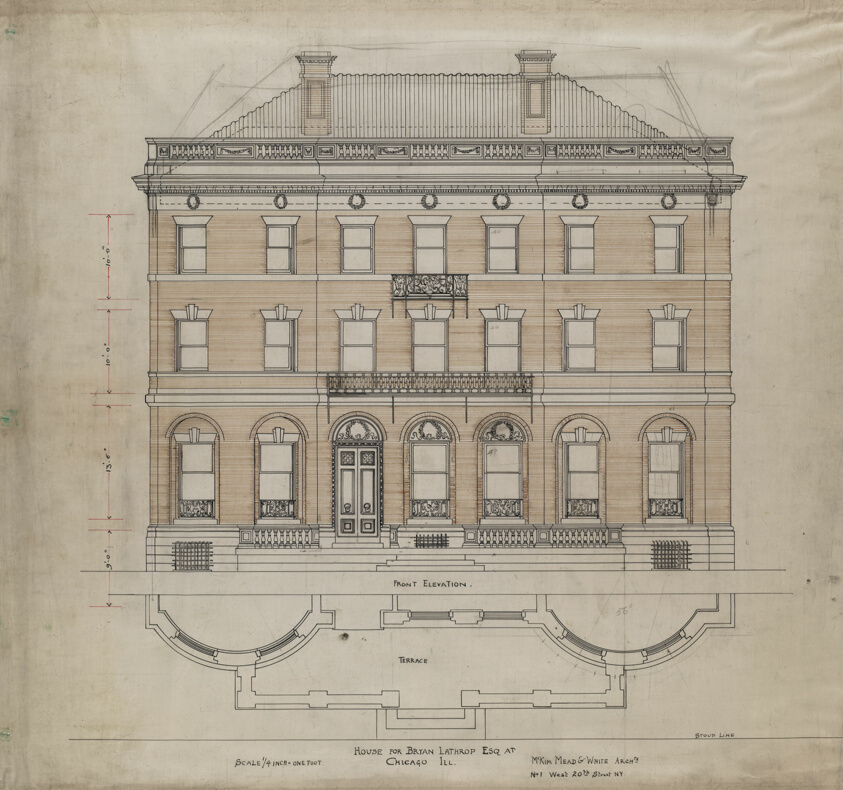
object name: Architectural Drawing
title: Bryan Lathrop House, Chicago, Illinois, Front Elevation and Terrace Plan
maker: McKim, Mead and White; American, 1879-1919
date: 1892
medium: Ink and colored pencil on linen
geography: Chicago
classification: presentation drawing; architectural drawing